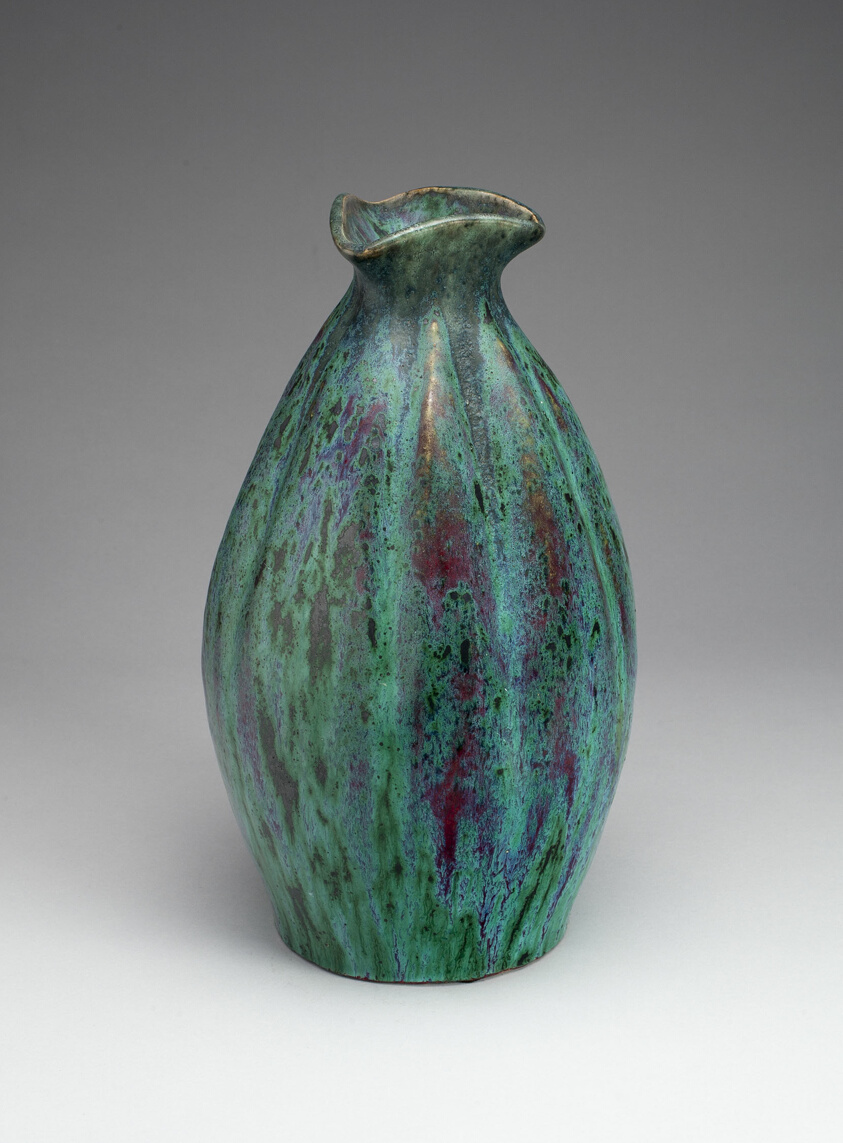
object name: Ceramics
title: Vase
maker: Pierre Adrien Dalpayrat; French, 1844-1910; Bourg-la-Reine, France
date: c. 1900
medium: Glazed stoneware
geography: France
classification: vase; vessel; ceramics